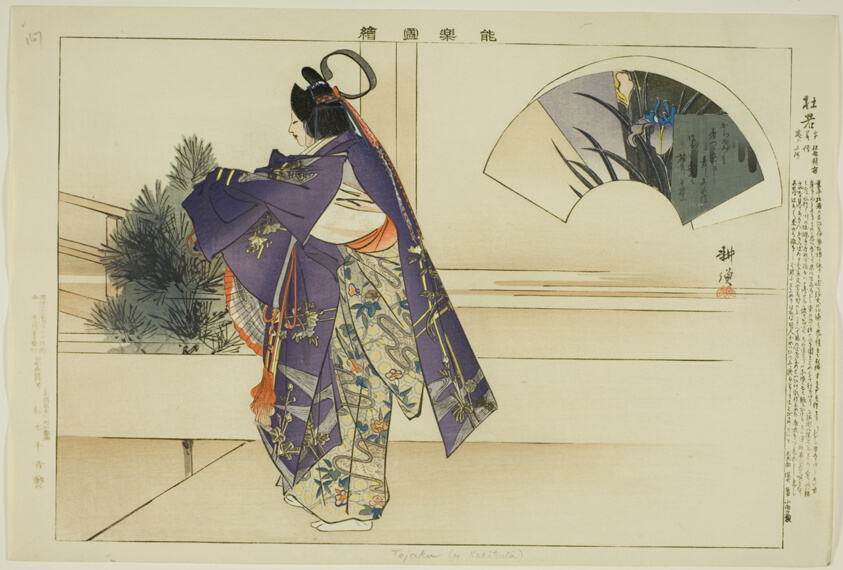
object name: Print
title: Tojaku (or Kakitsuta), from the series "Pictures of No Performances (Nogaku Zue)"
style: Japanese (culture or style)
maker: Tsukioka Kogyo; Japanese, 1869-1927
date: 1898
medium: Color woodblock print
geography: Japan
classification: woodblock print; print; asian art